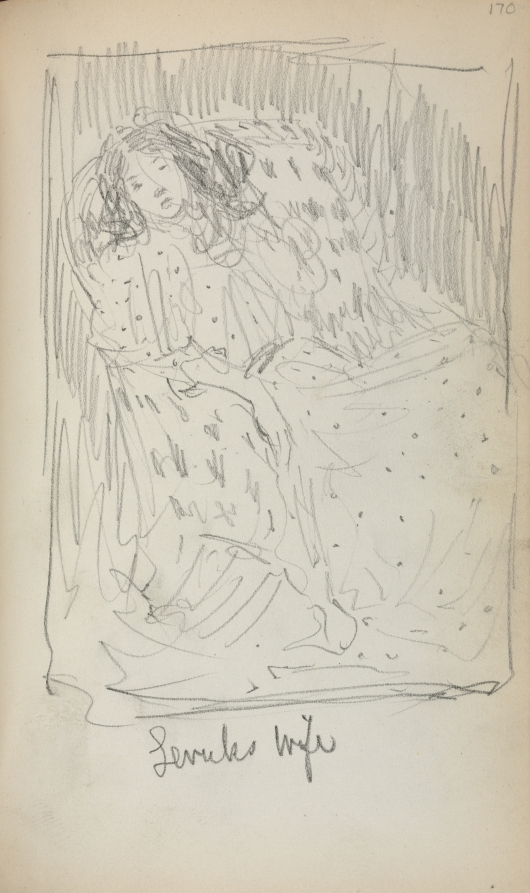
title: Italian Sketchbook: Levuk's Wife (page 170)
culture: America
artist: Maurice Prendergast (American, born Newfoundland [now Canada], 1858–1924)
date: 1898–1899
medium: pencil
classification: Bound Volume